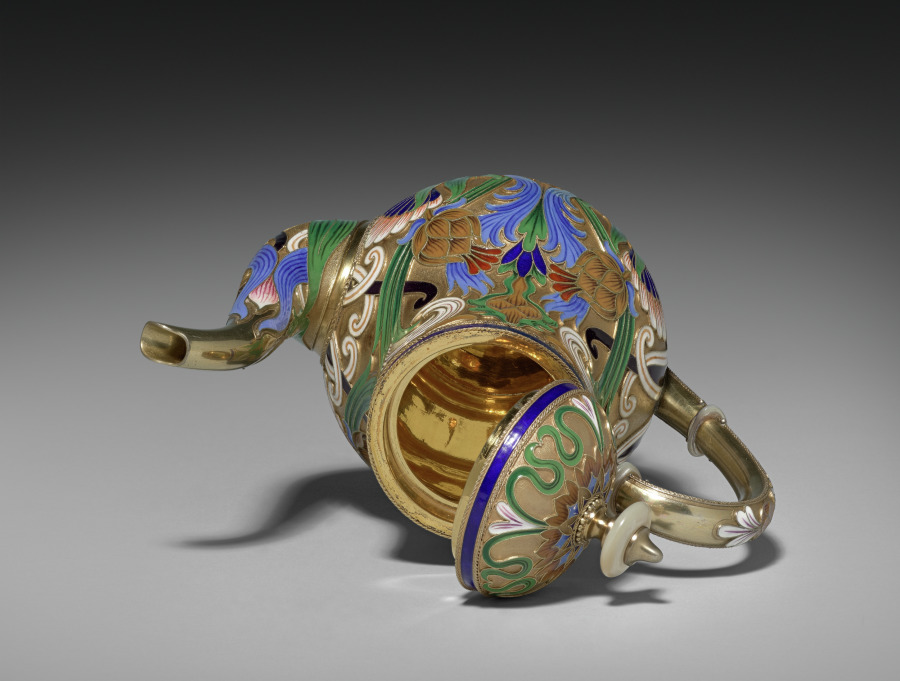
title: Covered Hot Water Pot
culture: Russia, St. Petersburg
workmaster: attributed to Feodor Ivanovich Rückert (Russian, 1840–1917)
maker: House of Fabergé (Russian, 1842–1918)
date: 1887–96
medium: silver gilt, opaque cloisonné enamel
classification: Miscellaneous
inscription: 88, St. George [assay mark for Moscow, 1882-1896]; C. Fabergé (in Cyrillic); double-headed eagle [imperial warrant]; 88; initials of Carl Fabergé (in Cyrillic).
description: Fabergé’s craftsmen in Moscow, especially under the watchful eye of workmaster Feodor Rückert, became known for their work in the pan-Slavic or neo-Russian style, hearkening back to 17th-century motifs of Russian folk art. Often on rather conventional shapes, Rückert and his silversmiths created an explosion of color, achieved through the historic technique of cloisonné enamel in which tiny metal lines are soldered to the surface then filled with glass powders in various colors and fired to create a high gloss finish. The result is a spectacular evocation of the 17th-century originals. Far from mere copies, however, Rückert's designs, such as this tea service, employ naturalistic or abstract motifs in a thoroughly modern adaptation of a remarkable earlier period of Russian art and decoration.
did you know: This covered hot water pot is part of a larger tea set.